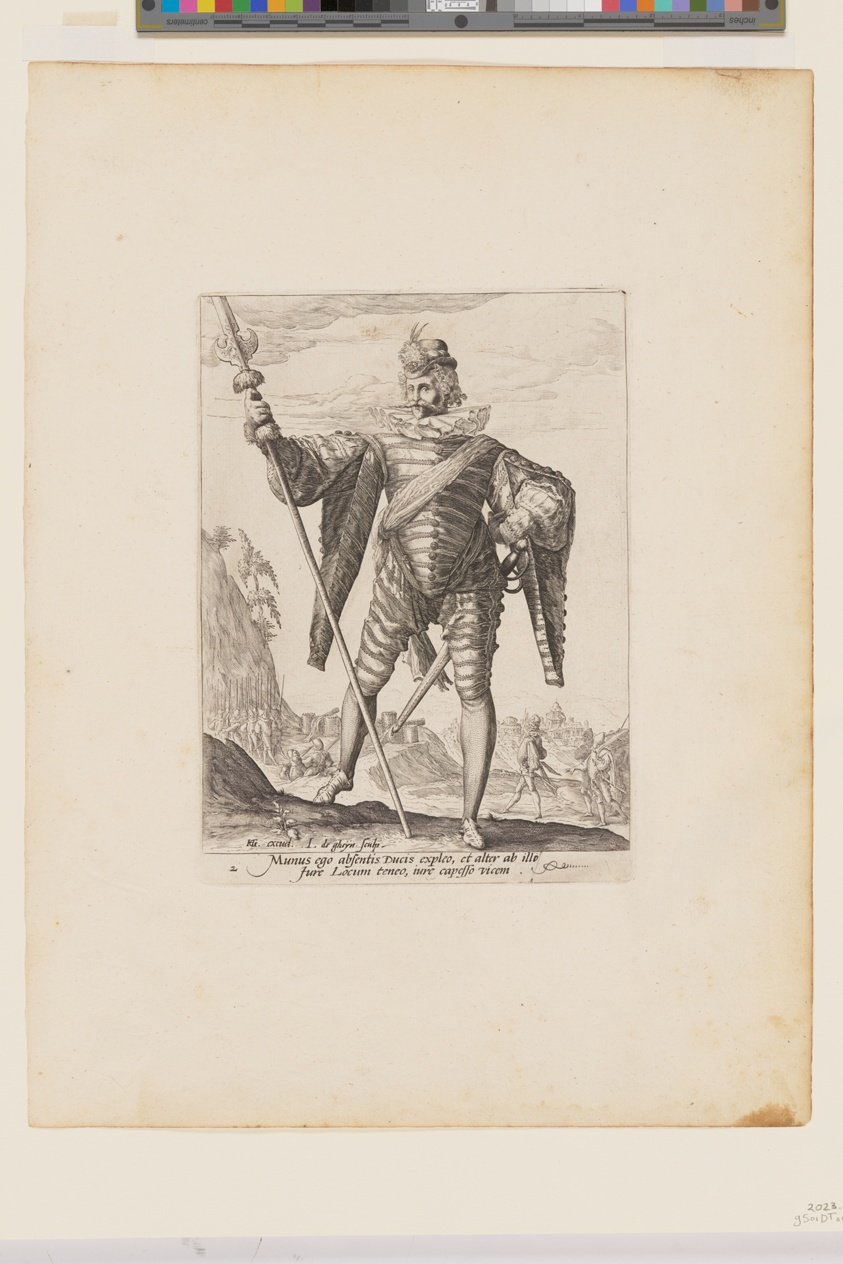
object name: Print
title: Lieutenant-Colonel, from Officers and Soldiers of the Bodyguard of Emperor Rudolph II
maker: Jacques de Gheyn II (Dutch, 1565–1629); after Hendrick Goltzius (Dutch, 1558–1617)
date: 1587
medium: Engraving on ivory laid paper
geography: Netherlands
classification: engraving; paper; print; prints and drawing